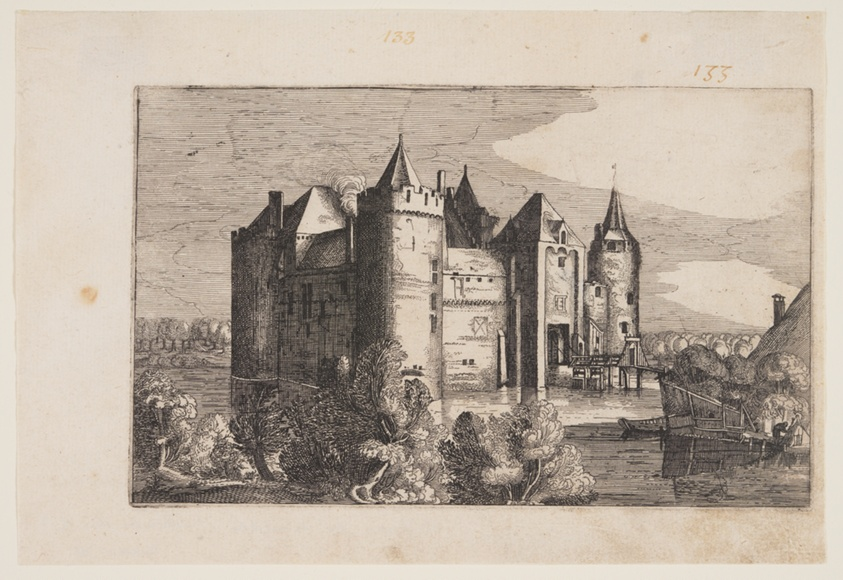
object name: Print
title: The Castle of Muiden, from Four Castles in Holland and Utrecht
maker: Claes Jansz. Visscher (Netherlandish, c. 1550–c. 1612)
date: c. 1617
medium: Etching on ivory laid paper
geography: Netherlands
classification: print; paper; prints and drawing; etching